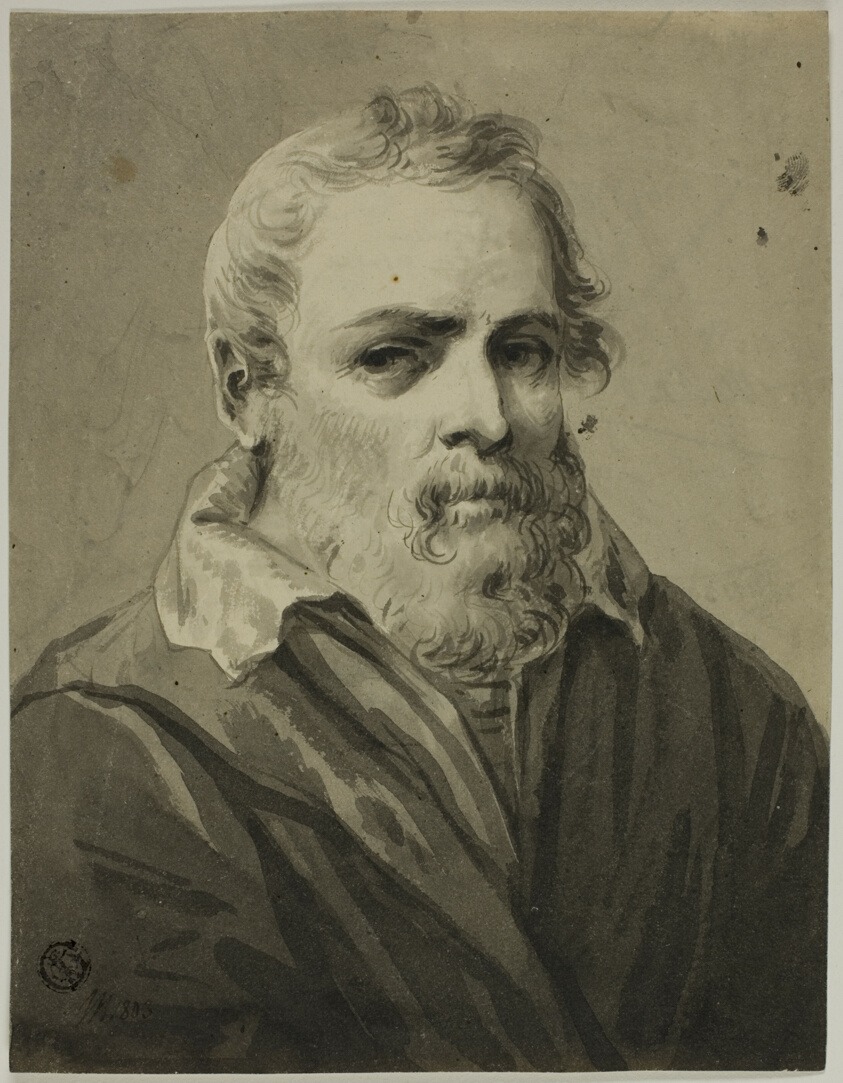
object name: Drawing and Watercolor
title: Portrait of Bearded Man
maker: Unknown artist; possibly French, 19th century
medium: Brush and black and gray wash on cream wove paper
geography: France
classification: ink or chalk wash; drawings (visual works); prints and drawing